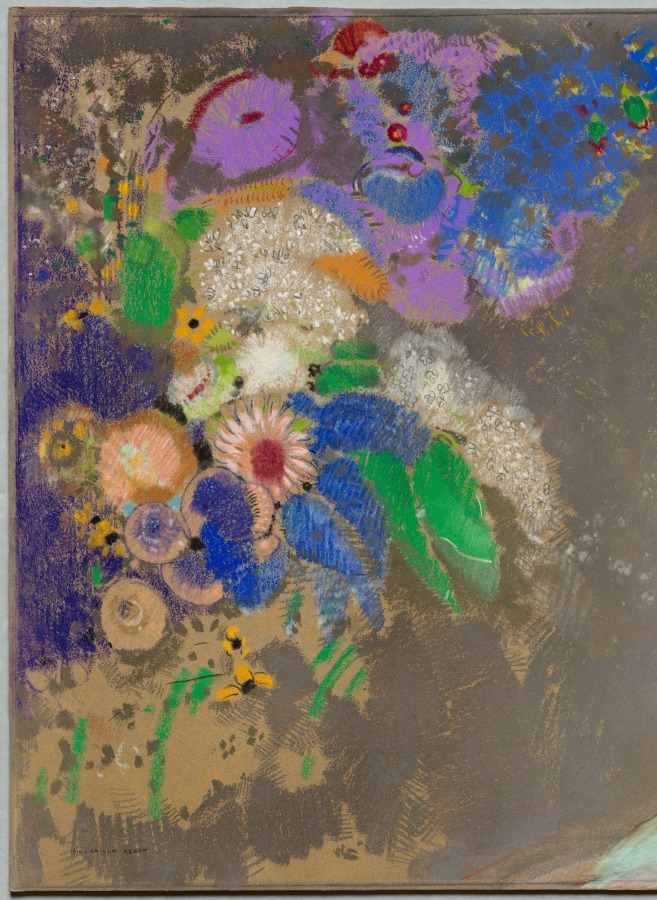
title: Violette Heymann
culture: France, early 20th Century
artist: Odilon Redon (French, 1840–1916)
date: 1910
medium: pastel on gray wove paper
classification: Drawing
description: Although he was known early in his career for works primarily in black and white, such as charcoal drawings and lithographs, Odilon Redon turned to more colorful media, including pastel, later on. In particular, he focused on commissioned pastel portraits of women with flowers, such as this one. Here, the young niece of the Parisian collector Marcel Kapferer appears alongside colorful blossoms as she looks forward, focused as if in the dreamlike state evoked by her surroundings.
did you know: This pastel was acquired by the Cleveland Museum of Art in the same year as several other works by Redon, leading arts writers to describe Cleveland as holding the most important works by the artist outside of Paris at the time.